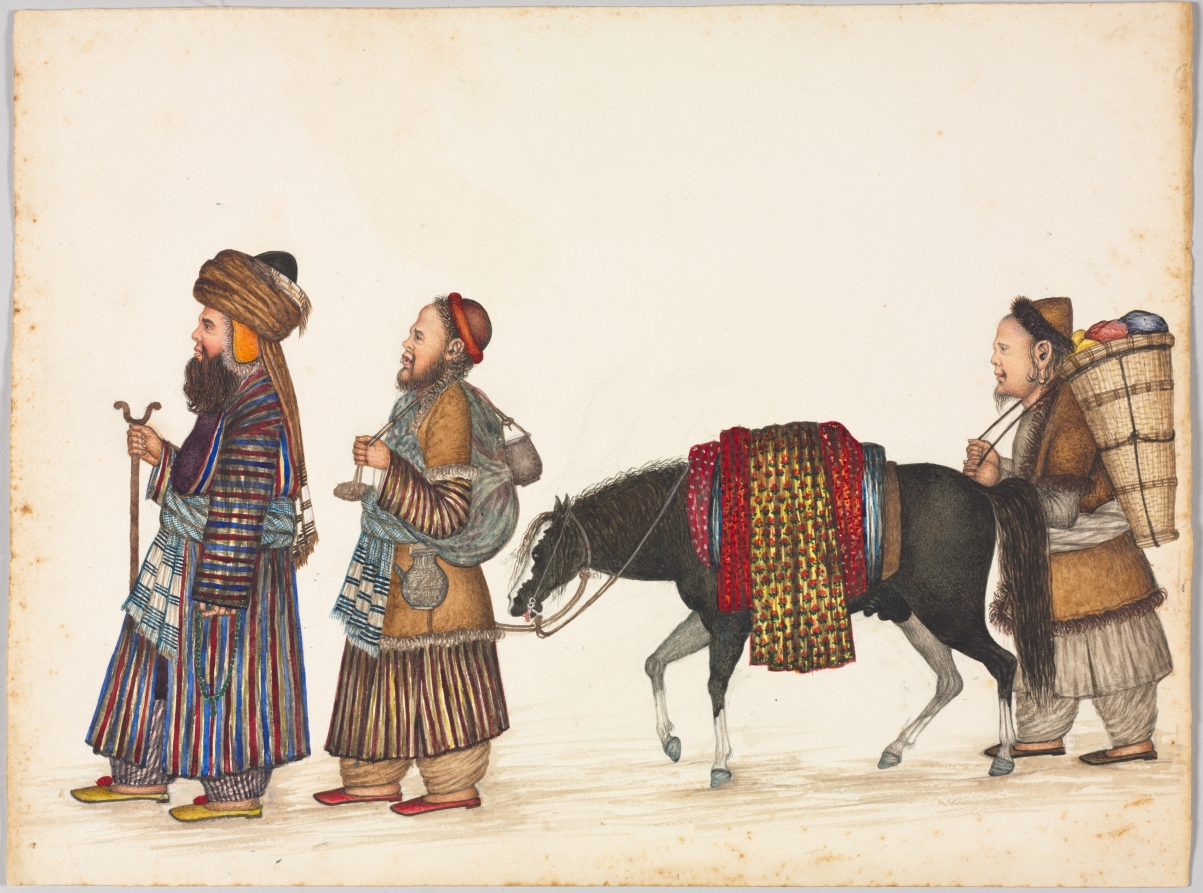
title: A Family of Tartars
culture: India, Punjab, probably Lahore, Company School, 19th century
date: c. 1885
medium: Gum tempera, ink, and gold on paper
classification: Painting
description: This painting depicts men of Turkic descent migrating into India from western Asia. No longer with the ambition to conquer, like the Turko-Mongol rulers Timur (d. 1405) and Babur (c. 1530), the first Mughal emperor, these migrants are seeking new lands in which to settle as immigrants. The highly detailed subjects are placed against a plain background, as if the figures were designed for objective study and categorization. Indian artists made works such as this for the British in India, who were interested in collecting accurate visual records of flora, fauna, and ethnic groups who inhabited the land they colonized in 1858.